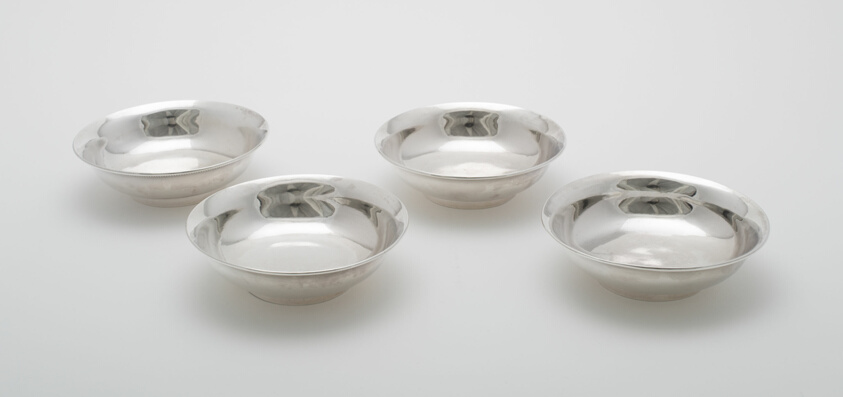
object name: Metalwork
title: Four Matching Dishes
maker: William I. Tenney (American, active 1808–1850)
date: 1828–50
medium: Silver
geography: United States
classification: dish (vessel); silver; american decorative arts; american arts; decorative arts